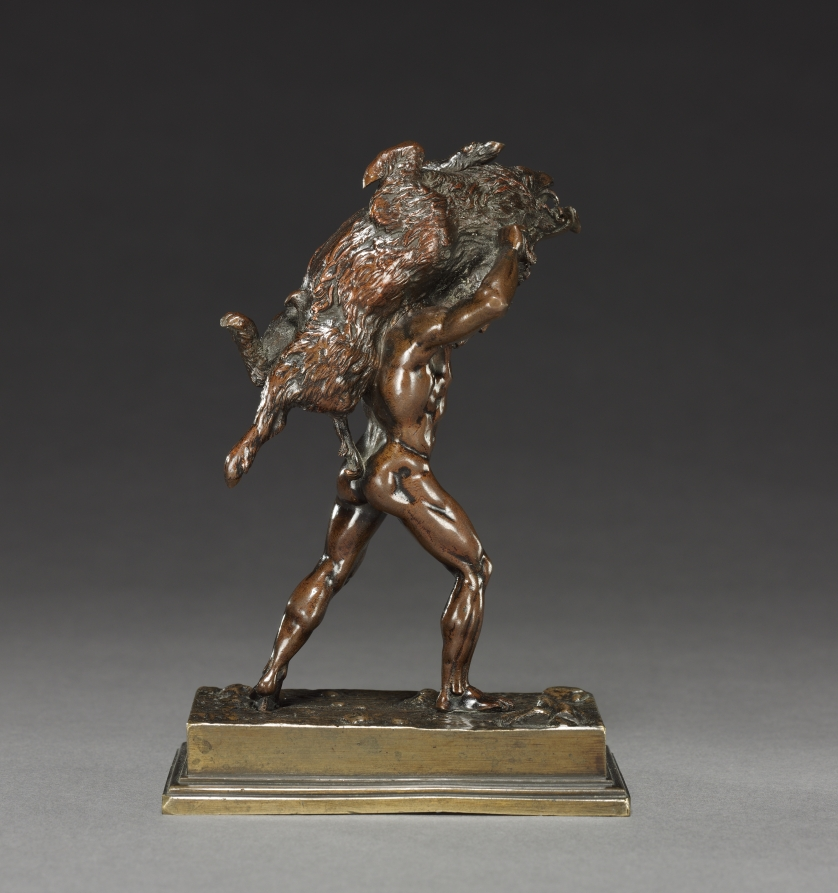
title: Hercules Carrying the Erymanthean Boar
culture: France, 19th century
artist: Antoine-Louis Barye (French, 1796–1875)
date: c. 1820–1830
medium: bronze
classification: Sculpture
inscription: signed on base: "BARYE."